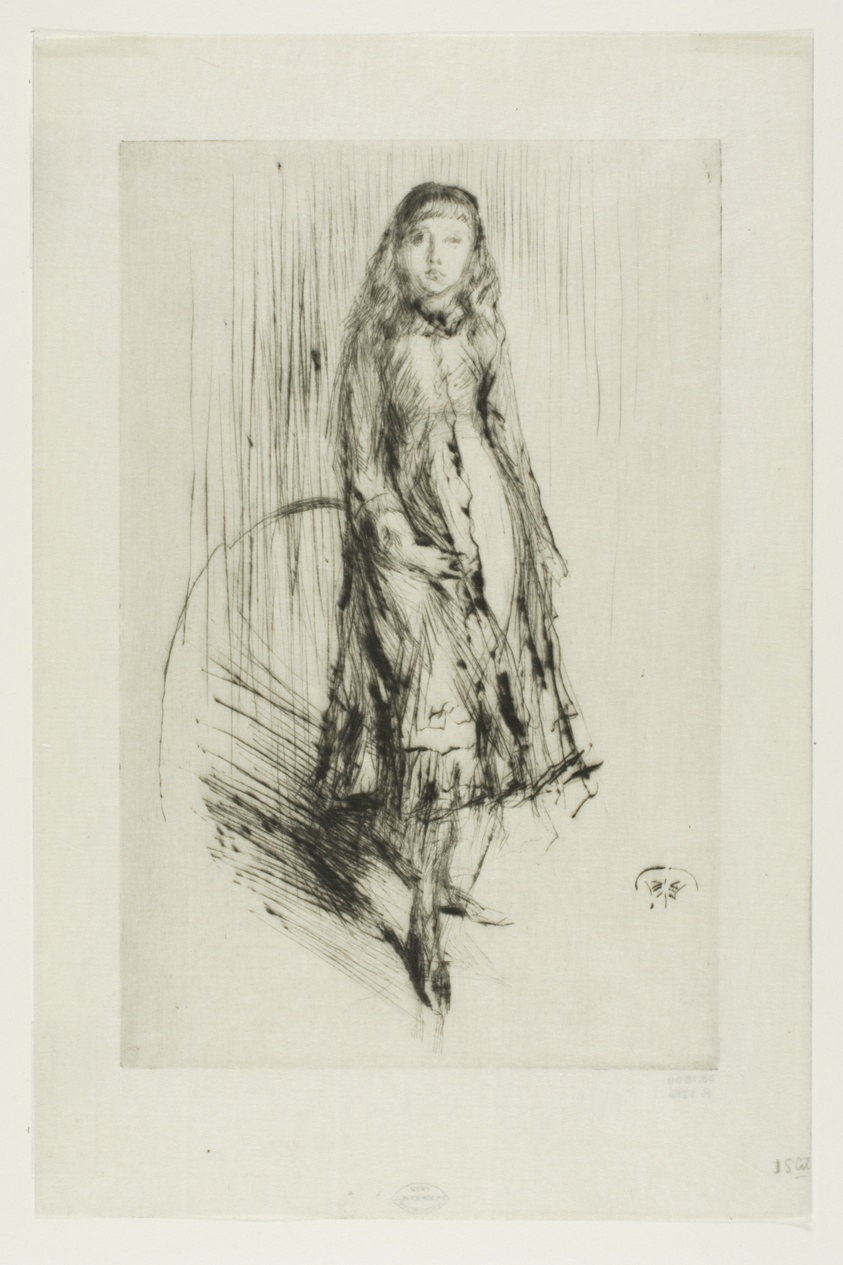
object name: Print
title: Florence Leyland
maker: James McNeill Whistler (American, 1834-1903)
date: 1874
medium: Drypoint in black ink on cream Japanese paper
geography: United States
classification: drypoint; print; prints and drawing; paper